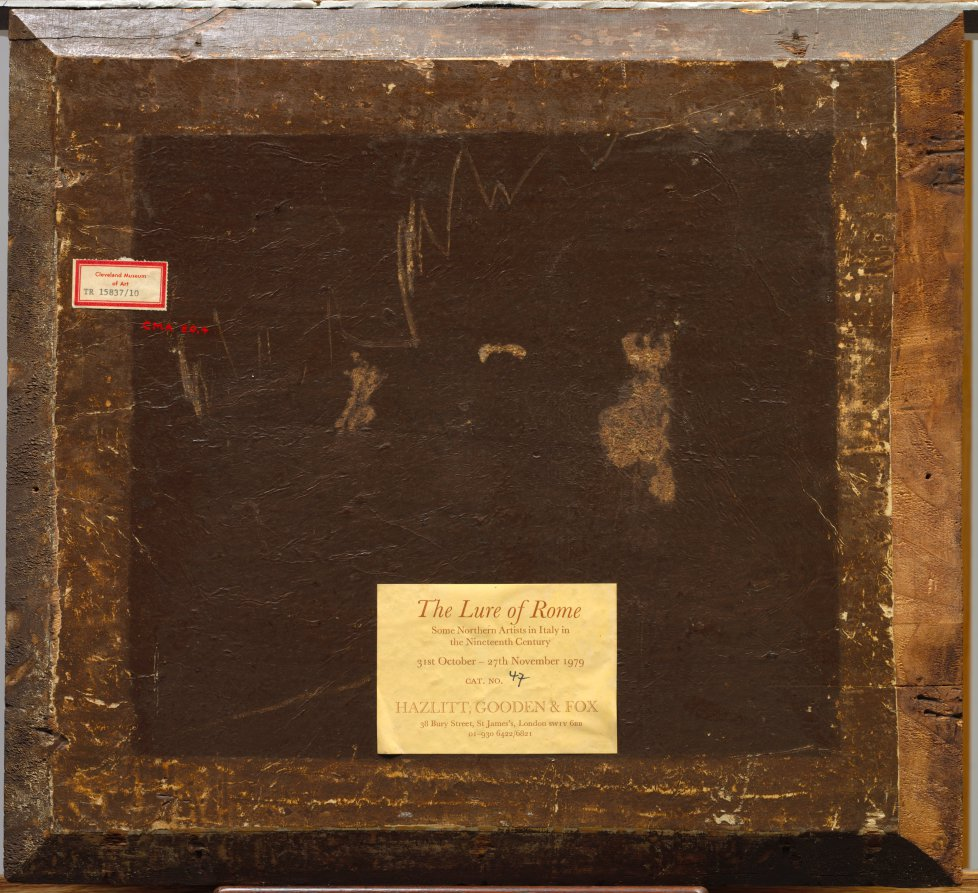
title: The Bathers, Souvenir of the Banks of the Anio River at Tivoli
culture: France, 19th century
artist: Théodore Caruelle d' Aligny (French, 1798–1871)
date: c. 1860/1861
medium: oil on wood panel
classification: Painting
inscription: Signed lower center: th. aligny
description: Although painted in France, this work depicts bathers near Tivoli, a popular, parklike estate near Rome, famous for its fountains, picturesque hills, and lush forests. As was the custom for many artists of the 19th century, d'Aligny traveled to Italy to study. He remained there from 1825 until 1827, making careful drawings and oil sketches directly from the Roman countryside. He would often use these works to compose more finished paintings in his studio. Although d'Aligny visited Italy twice more, his last trip was in 1843. This painting, made years after that date, is therefore a true souvenir, that is, a recollection evoking his experiences in Italy